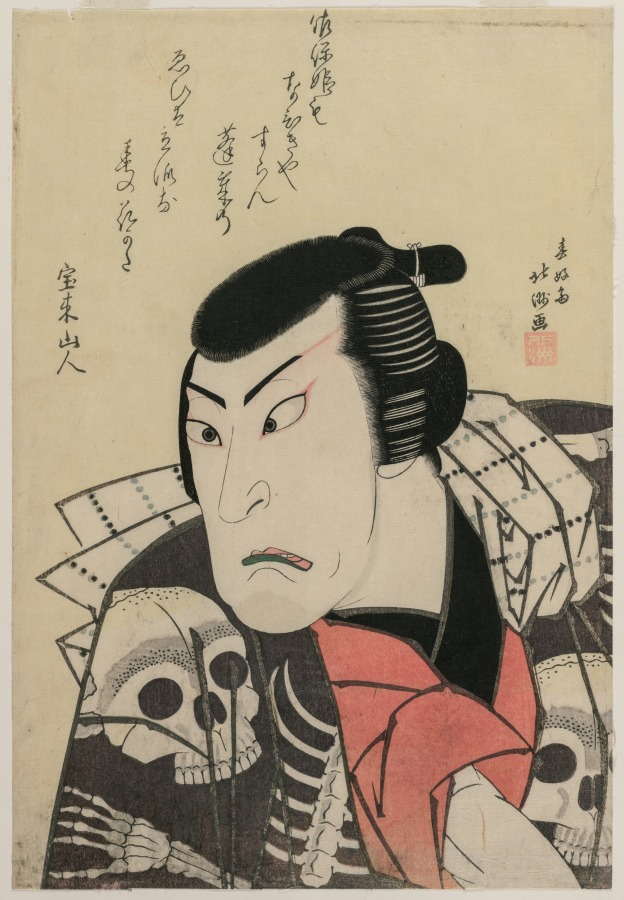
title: Actor Ichikawa Ebijūrō I as Tōken (China Dog) Jūbei, in the play Red and Purple, Rich Dyes of Osaka (Benimurasaki ai de someage)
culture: Japan, Edo period (1615–1868)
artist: Shunkōsai Hokushū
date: 1816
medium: color woodblock print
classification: Print